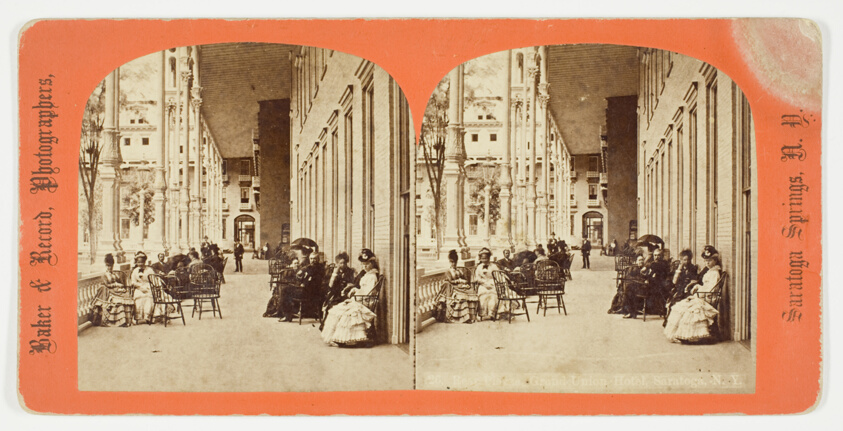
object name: Photograph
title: Rear Piazza, Grand Union Hotel, Saratoga, N.Y., No. 26 from the series "Saratoga Springs, N. Y."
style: 19th century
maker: Baker & Record, Photographers (American, active late 19th century)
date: 1875/99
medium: Albumen print, stereo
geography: Saratoga Springs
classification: photography; photograph